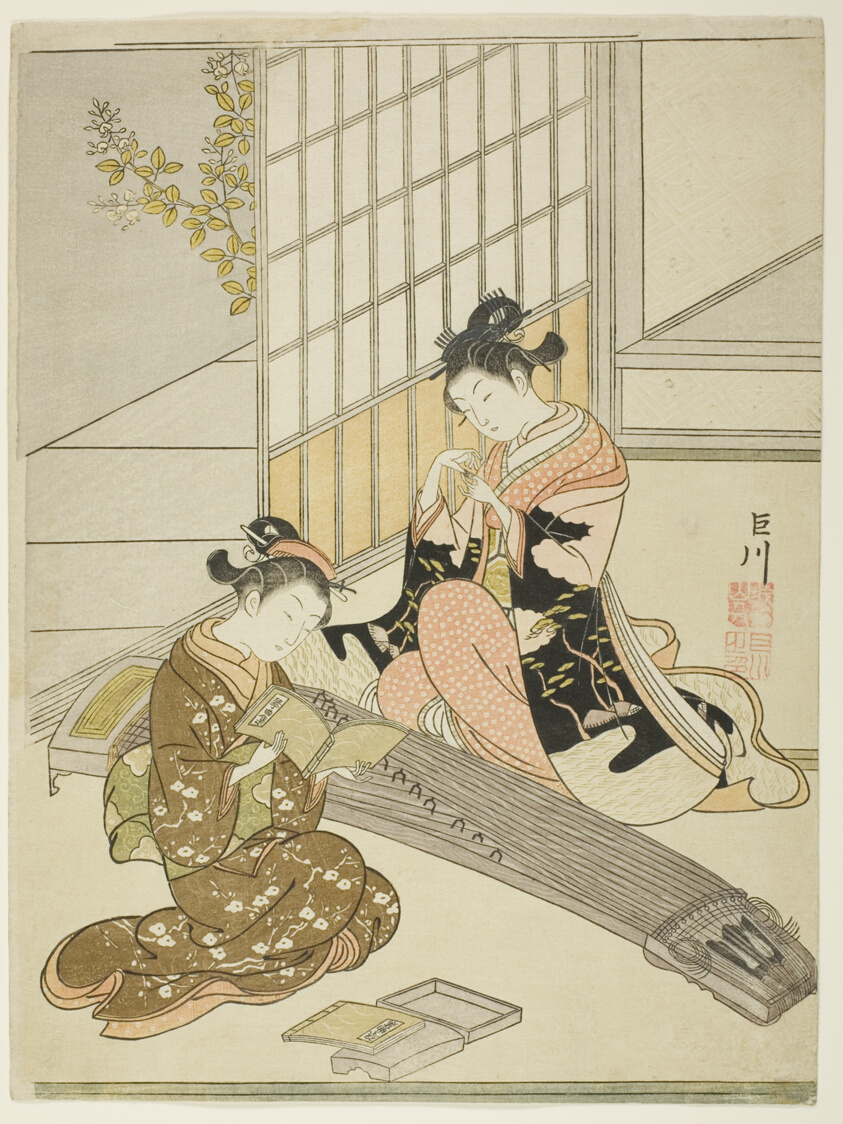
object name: Print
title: Descending Geese of the Koto Bridges (Kotoji no rakugan), from the series "Eight Views of the Parlor (Zashiki hakkei)"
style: Japanese (culture or style)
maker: Suzuki Harunobu 鈴木 春信; Japanese, 1725 (?)-1770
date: c. 1766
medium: Color woodblock print; chuban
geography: Japan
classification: woodblock print; print; asian art